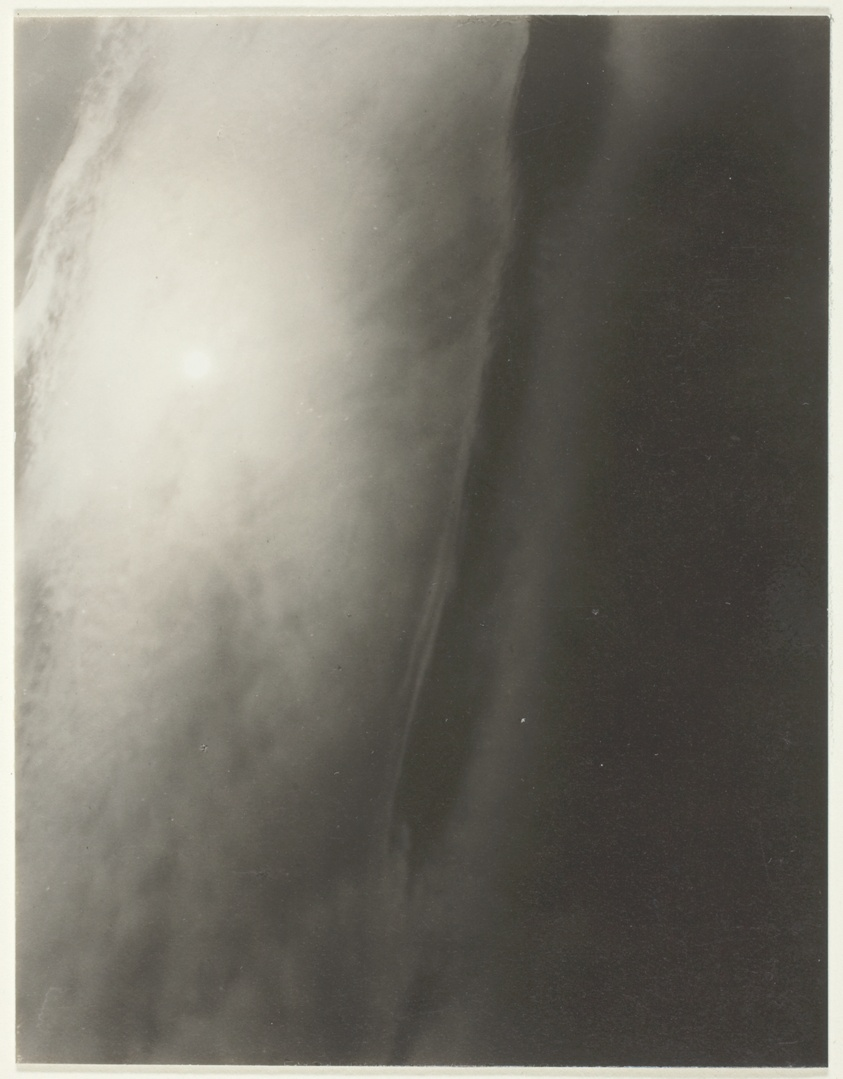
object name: Photograph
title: Equivalent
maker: Alfred Stieglitz (American, 1864–1946)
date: 1931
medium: Gelatin silver print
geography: United States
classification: gelatin silver (developing-out-paper) pr; photographic process; photography; photograph